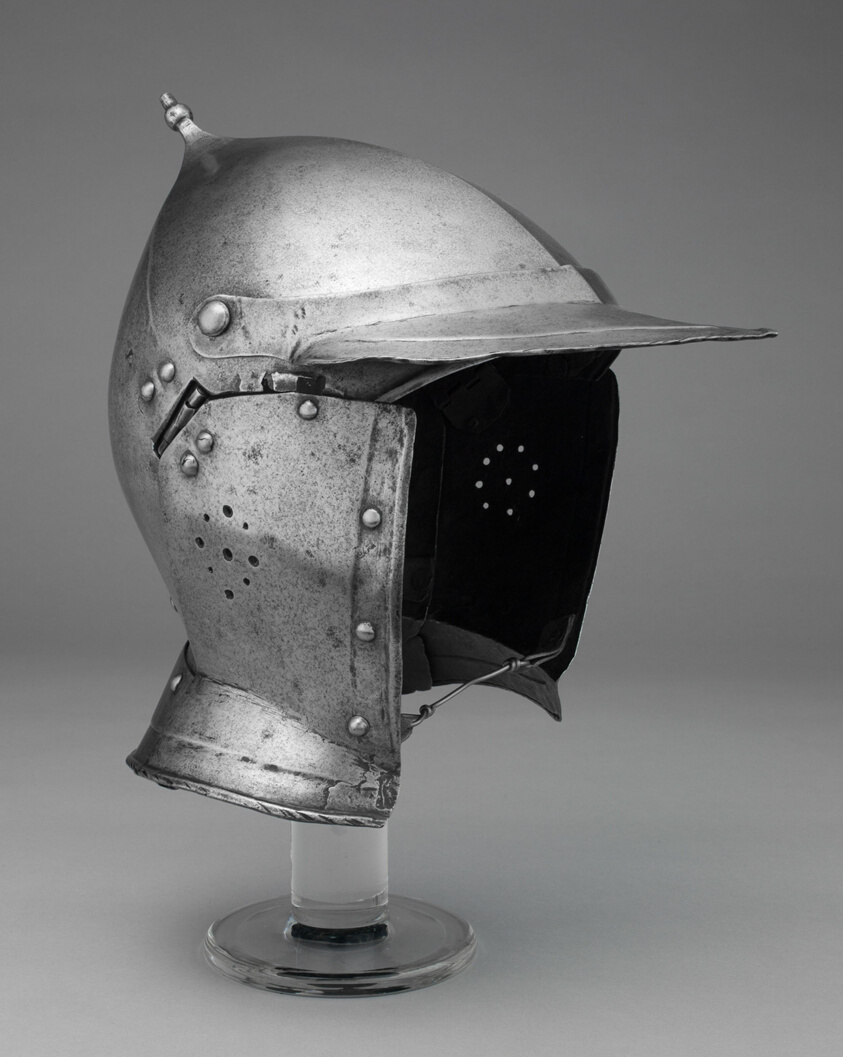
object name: Armor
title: Burgonet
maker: German, Nuremberg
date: c. 1560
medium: Steel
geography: Nuremberg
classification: suit-helmet; armor; arms and armor